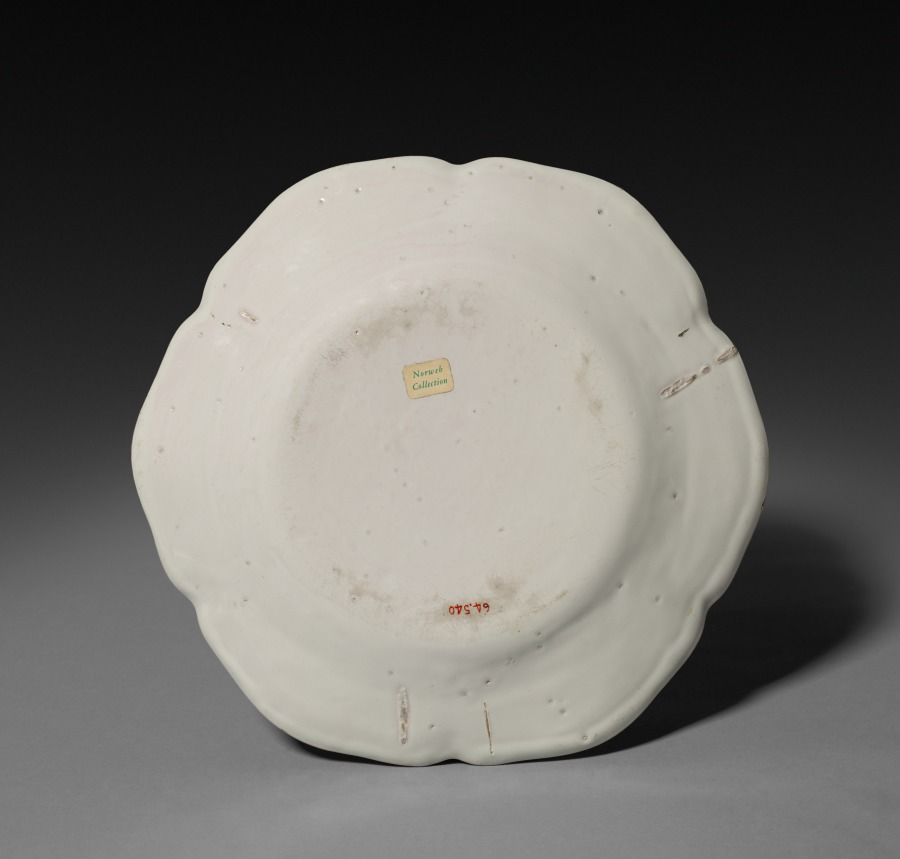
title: Large Plate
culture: France, Strasbourg, 18th century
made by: Strasbourg Factory (France)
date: c. 1762–1779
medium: faience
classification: Ceramic